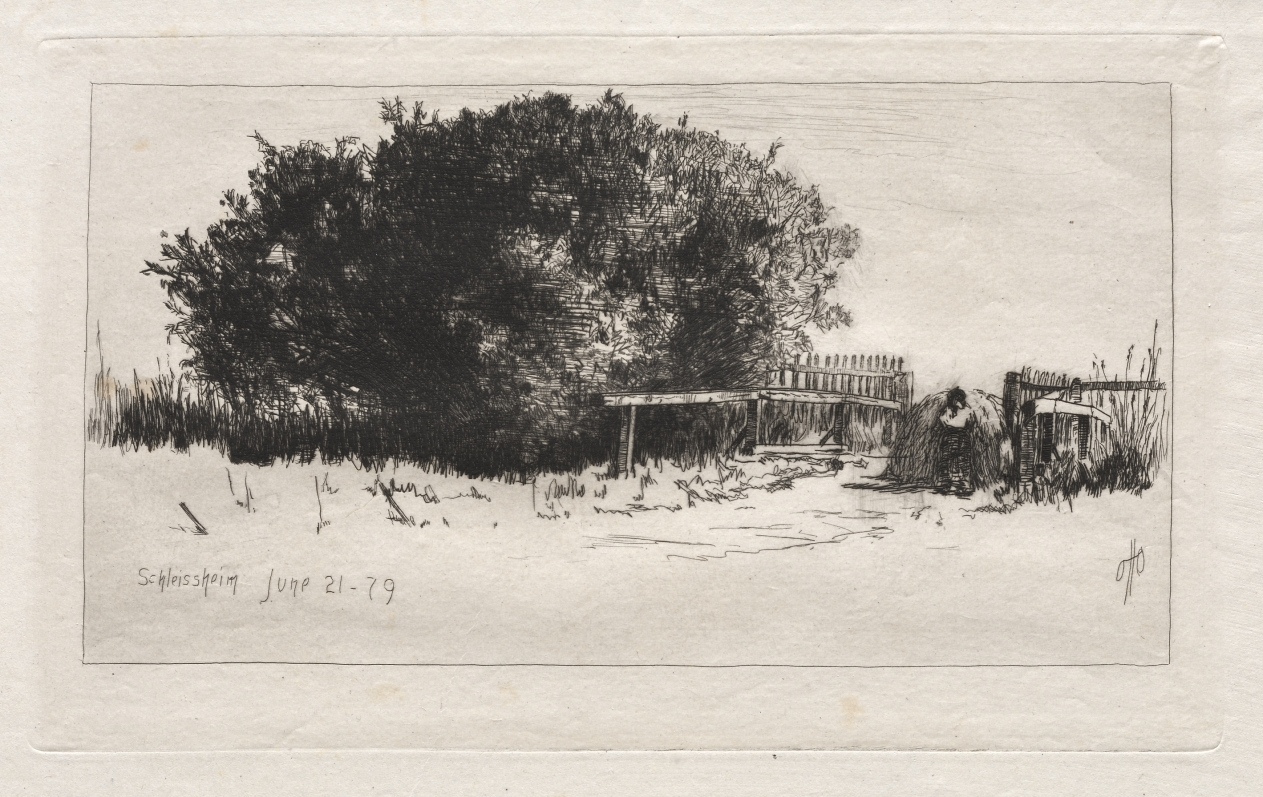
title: The Gate, Schleissheim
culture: America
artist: Otto H. Bacher (American, 1856–1909)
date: 1879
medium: etching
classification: Print